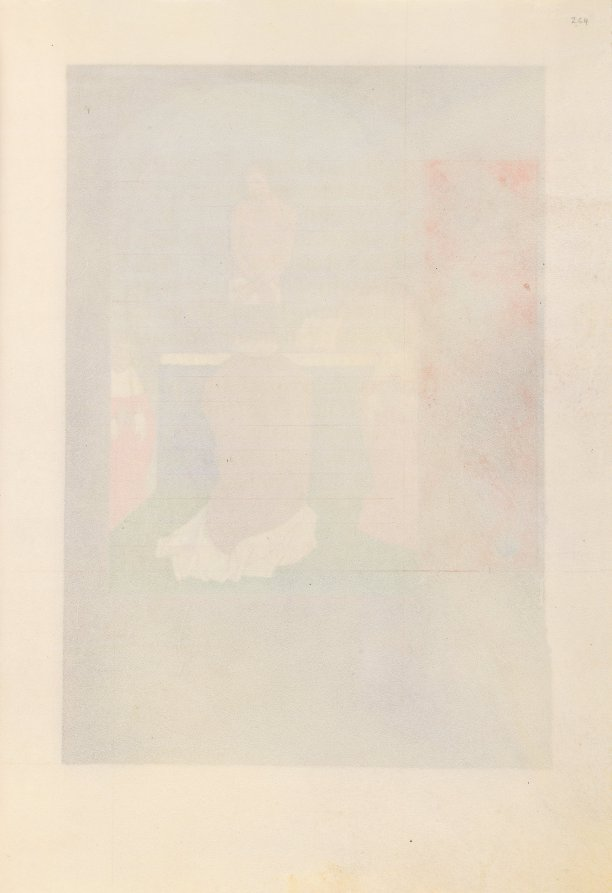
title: Hours of Queen Isabella the Catholic, Queen of Spain: Fol. 264r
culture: Flanders, Ghent and Bruges, late 15th century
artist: Master of the First Prayerbook of Maximillian (Flemish, c. 1444–1519)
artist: and Associates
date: c. 1500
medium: ink, tempera, and gold on vellum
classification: Bound Volume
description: This manuscript was illuminated by a circle of at least five highly organized manuscript painters active in the Flemish cities of Ghent and Bruges. The principal illuminator was Alexander Bening, who painted the majority of the book's miniatures. Manuscripts produced by this circle of artists are renowned for the decoration of their borders, which typically feature a rich variety of realistically-painted flowers, birds, and butterflies. This prayer book, called a book of hours, was intended not for a cleric, but for the private devotions of a lay person-in this case, Isabella the Catholic, Queen of Spain (1451-1504). Isabella's coat of arms embellishes the book's frontispiece. It is unlikely that the book was commissioned by the Queen herself; rather, she probably received it as a diplomatic gift from someone courting her patronage, perhaps Cardinal Francisco Jimenez de Cisneros. A Franciscan friar, Jimenez was dependent upon Isabella for his advancement, first to the post of Queen's confessor in 1492, and then to Archbishop of Toledo in 1495.